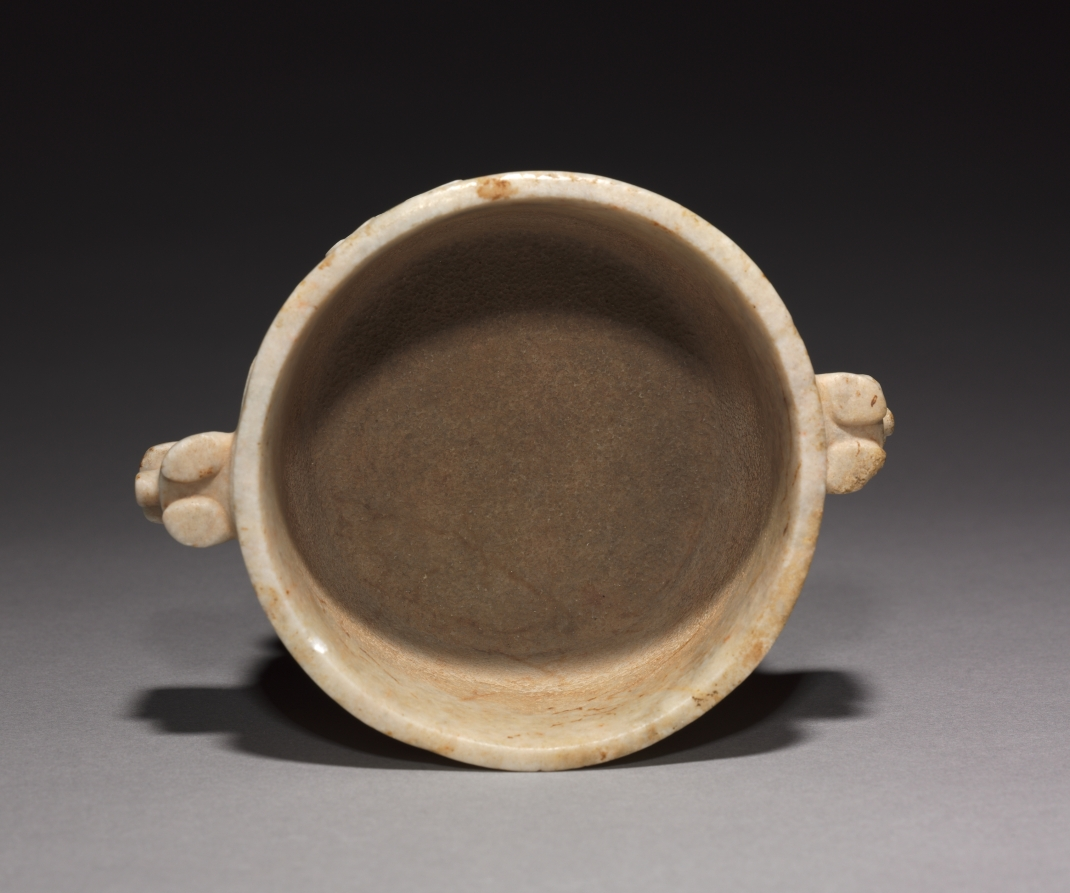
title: Ring-Base Vessel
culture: Honduras, Maya, Ulúa Valley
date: c. 600–1000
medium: marble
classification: Sculpture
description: The Ulúa region of Honduras, to the east of Maya territory, is best known for white marble vessels with walls ornamented in low relief and handles carved as animal heads, here bats but also felines, birds, monkeys, and others. This small example is distinguished by the crispness of its carved scrolls and the triangular cutouts of its pedestal base.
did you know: One of two vessels that were the first ancient American artworks collected by James and Florence Gruener.